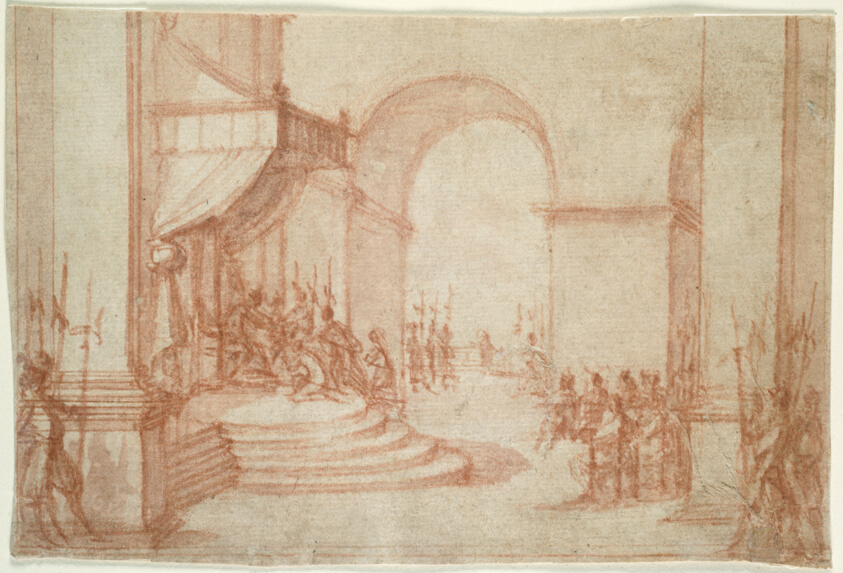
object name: Drawing and Watercolor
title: Pilate Washing His Hands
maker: Jacques Callot (French, 1592-1635)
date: 1631–1634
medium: Red chalk, with brush and red chalk wash, on cream laid paper, laid down on cream wove paper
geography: France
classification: chalk; drawings (visual works); prints and drawing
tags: Christian subjects, mythology, prints and drawings